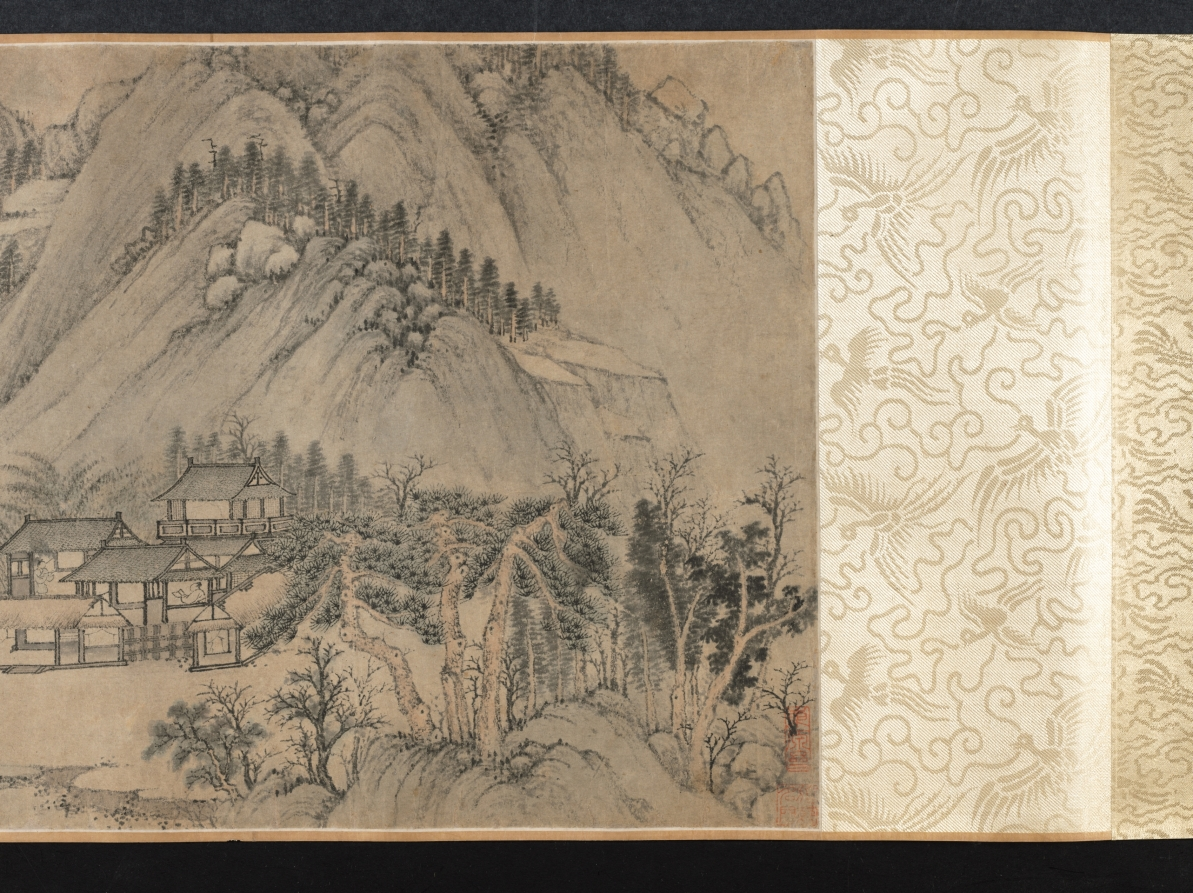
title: Mt. Taibo in the Style of Wang Meng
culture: China, Ming dynasty (1368–1644)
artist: Du Qiong (Chinese, 1396–1474)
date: 1442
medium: handscroll; ink and light color on paper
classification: Painting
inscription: Artist's inscription, signature, and 11 seals: [1 seal] Tung-yüan chai. Huang-ho-shan-ch'iao [Wang Meng] painted a painted called T'ai-po Mountain. Its brushwork is superior and admirable, which is very close to Yu-ch'en [Wang Wei, 699-759]. The cleverness of its composition, the maple groves and rustic temples, the inaccessible ravines and autumnal plateaus, the periolous peaks and strange rocks, etc., all seem to be so natural. The paper is only a little over eight feet, but the landscape has the range of a thousand miles. Once you open and note the contents, it is as if one were roaming among the mountain peaks enveloped in mist and clouds, and forgot the dusty world. When I first saw this, I was so mixed with excitement and joy that I could not take my hands off the painting. So I put it on the table, and tried my best to imitate it, forgetting sleeping and eating for about three months before it was completed. Although I do not dare to tread in the footsteps of Huang-ho shan ch'iao, I took great pains to capture his spirit in composition and colors. I do not know whether it would pass the judgment of the experts. On the fifteenth day of the fifth month, the seventh year of the Cheng-t'ung year [1442], inscribed by Tung-yüan, Tu Chiung. [2 seals] Yung-chia; Ching-chieh ming-men. [8 seals on painting] Tung-yüan chai; Ching-chieh ming-men; Yung-chia; Tu Ch'iung yin; Tung-yüan (repeated 5 times). trans. WKH/LYSL 3 colophons and 7 additional seals: 1 colophon and 2 seals of Chou Ting (1401-1487); 1 colophon and 2 seals of Wu K'uan (1435-1504); 1 colophon, dated 1655, and 2 seals of Lan Ying (1585-after 1664).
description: When a Chinese painter "imitated" a painting by a past master, the intention was never to produce an exact copy. Du Qiong, the Ming painter from Suzhou, is a case in point. The painting style of this handscroll is actually closer to that of Huang Gongwang (1269–1354) than to the style of Wang Meng (about 1301–1385). Both masters were active during the previous dynasty and are among the so-called Four Great Masters of the Yuan dynasty (1279–1368). In this painting, the interplay of styles, including Du Qiong's own, contribute to an inner dimension that is more than visual. Mt. Taibo is located in the province of Zhejiang and is known for its scenic beauty. In this scroll, however, it is not depicted literally. The image is an ideal representation of mountains in southeastern China.